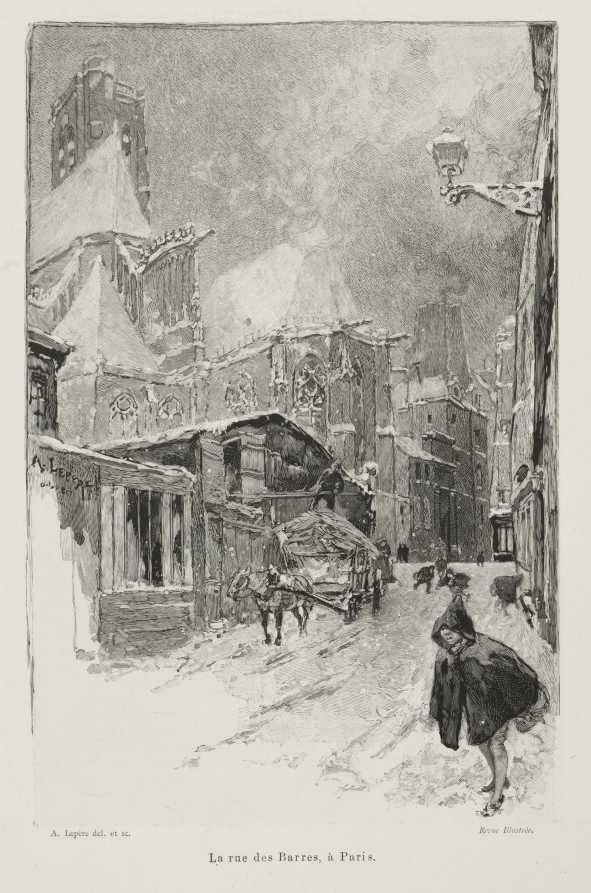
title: La Rue des Barres, Paris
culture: France, late 19th-early 20th Century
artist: Auguste Louis Lepère (French, 1849–1918)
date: 1886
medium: wood engraving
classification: Print